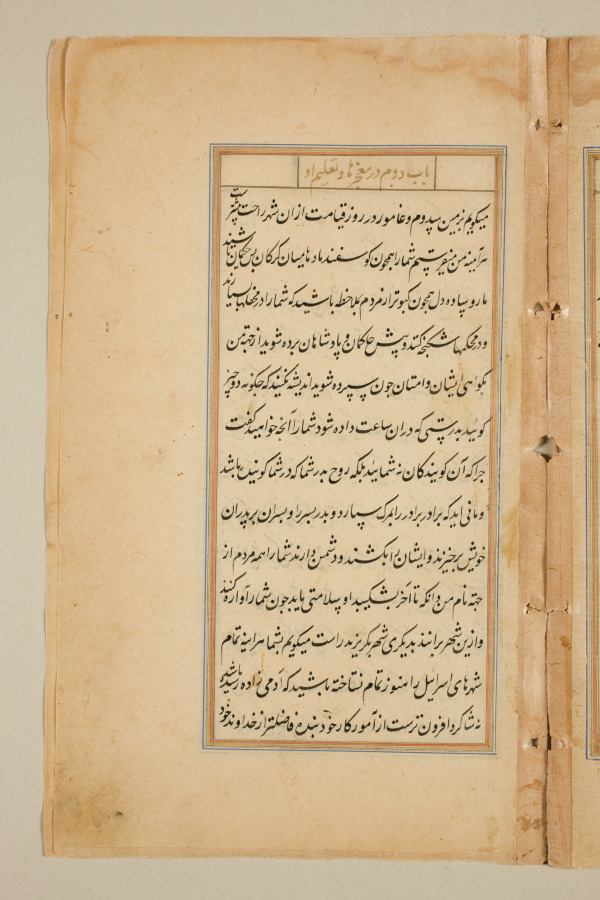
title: Text page from a Mirror of Holiness (Mir’at al-quds) of Father Jerome Xavier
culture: Mughal India, Allahabad, made for Prince Salim (1569–1627)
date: 1602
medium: Ink and gold on paper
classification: Manuscript